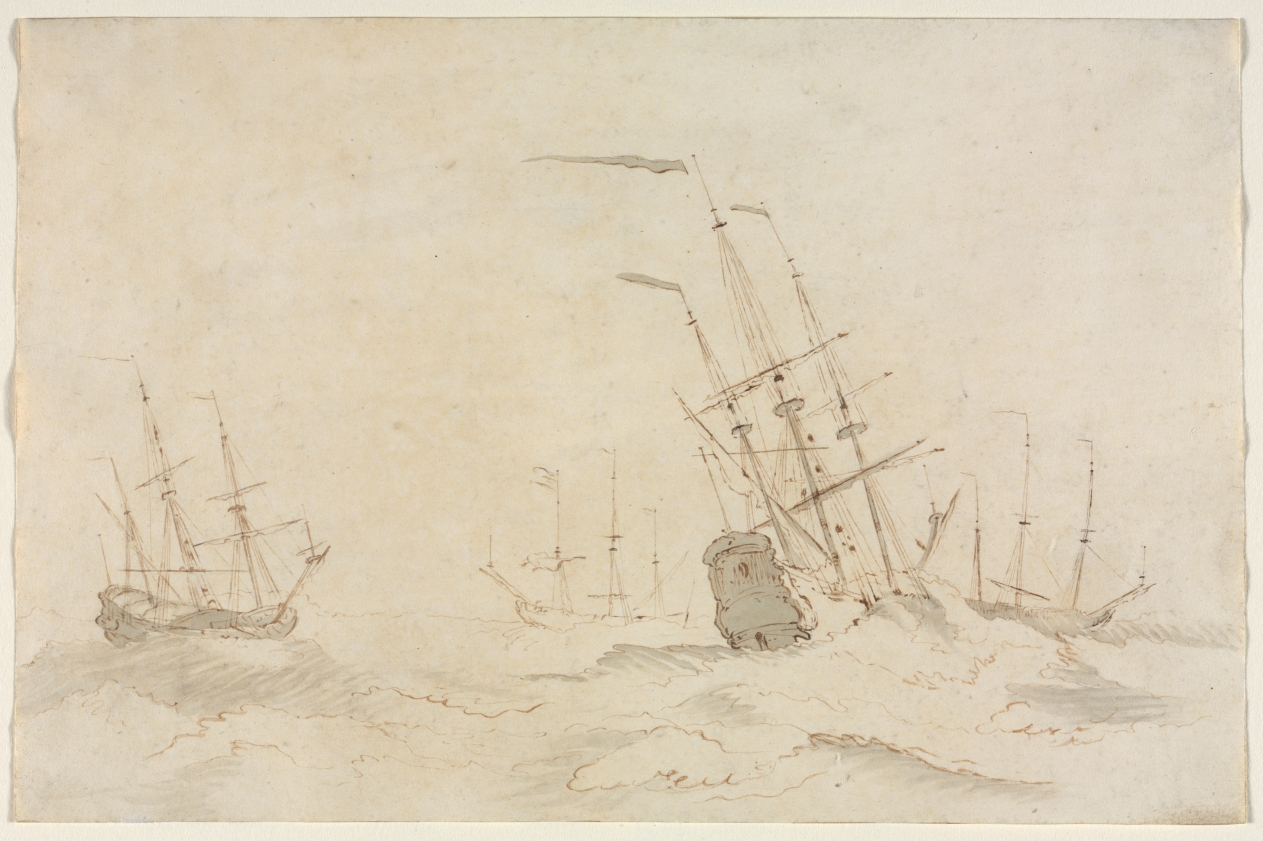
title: Ships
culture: Netherlands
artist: Ludolf Backhuysen (Dutch, 1631–1708)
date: 1650–1700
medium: pen and brown ink and brush and gray wash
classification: Drawing